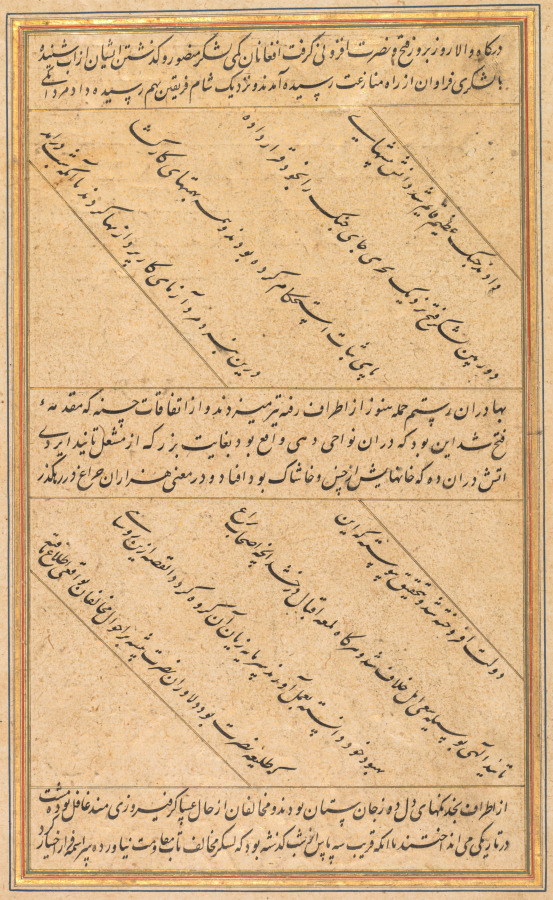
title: Mughal ruler Humayun defeating the Afghans before reconquering India, folio from an Akbar-nama (Book of Akbar) of Abu’l Fazl (Indian, 1551–1602)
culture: Mughal India, court of Akbar (reigned 1556–1605)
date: c. 1590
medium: Gum tempera, ink, and gold on paper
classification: Painting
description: In a battle that took place in 1555, the second Mughal emperor, Humayun, reconquered northern India from the Afghans with the help of Iranian military forces. His mounted figure stands out from the fray, with his golden helmet and red tunic silhouetted against a hillside in the upper center of the composition. To illustrate the beginning of hisown biography, Humayun’s son Akbar included this image of his father riding victoriously back to India. The scene never actually occurred in this way, since Humayun did not participate in this particular battle; his inclusion here is symbolic.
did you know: A well-trained war elephant can pull an opponent off his horse with its trunk.